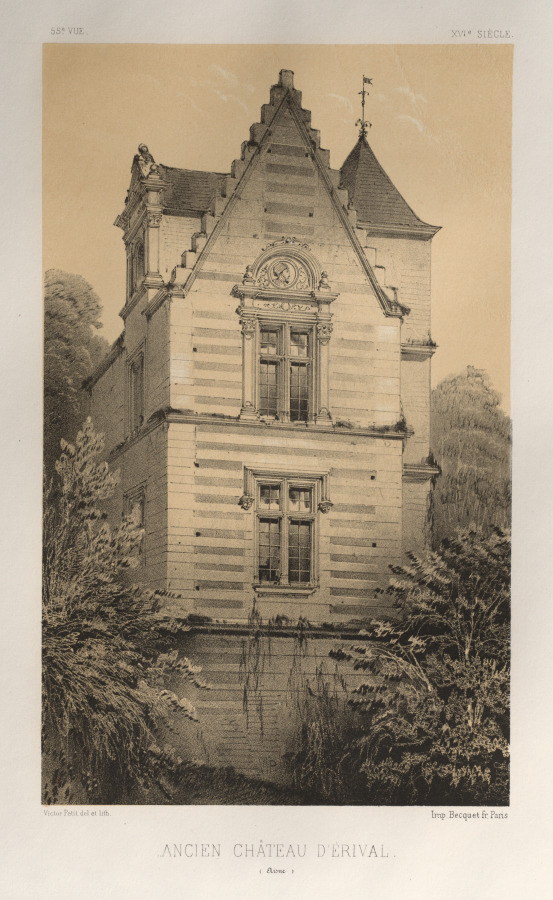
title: Architecture Pittoresque ou Monuments des XVeme. Et XVIeme. Siecles: Chateaux de France des XV et XVI Siecles: Pl. 55, Ancien Château D'Érival (Aisne)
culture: France, 19th century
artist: Victor Petit (French, 1817–1874)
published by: Charles Boivin (publisher and editor); Lith de Godard a Paris (printer)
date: 1860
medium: lithograph with tint stone, from portfolio of 100 lithographs with tint stone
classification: Print